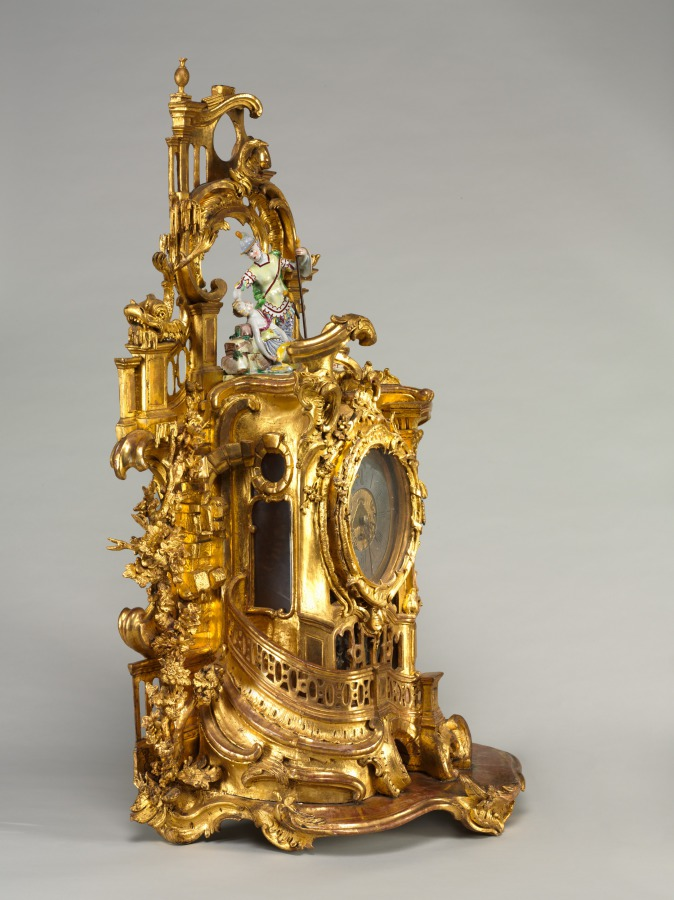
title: Clock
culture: Germany, 18th century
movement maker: Baumgartinger (German)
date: c. 1750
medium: carved and gilded wood, faience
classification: Furniture and woodwork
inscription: inscribed on face: Baumgartnger [sic] Mergentheim.